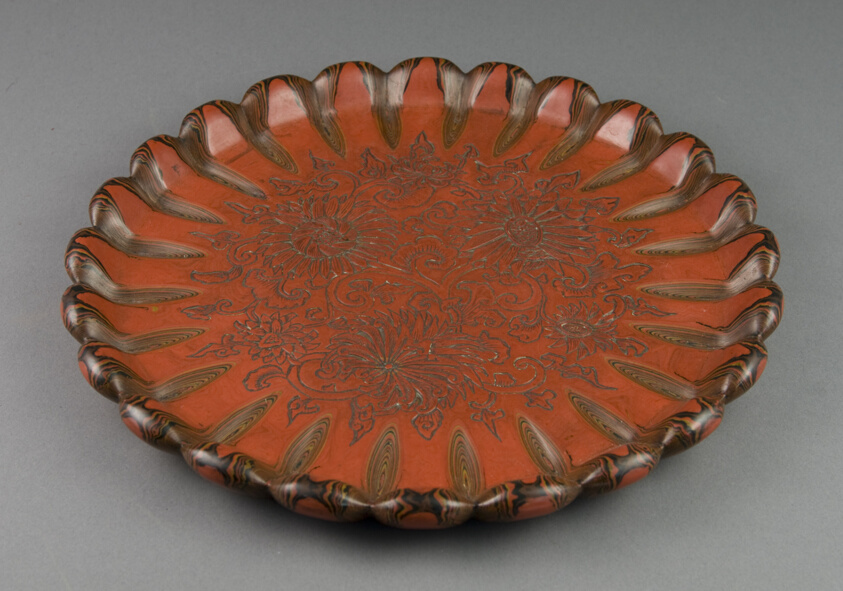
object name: Decorative Arts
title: Tray with Chrysanthemum Design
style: Japanese (culture or style)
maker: Japan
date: 19th century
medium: Lacquer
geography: Japan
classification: lacquerware; asian art; decorative arts